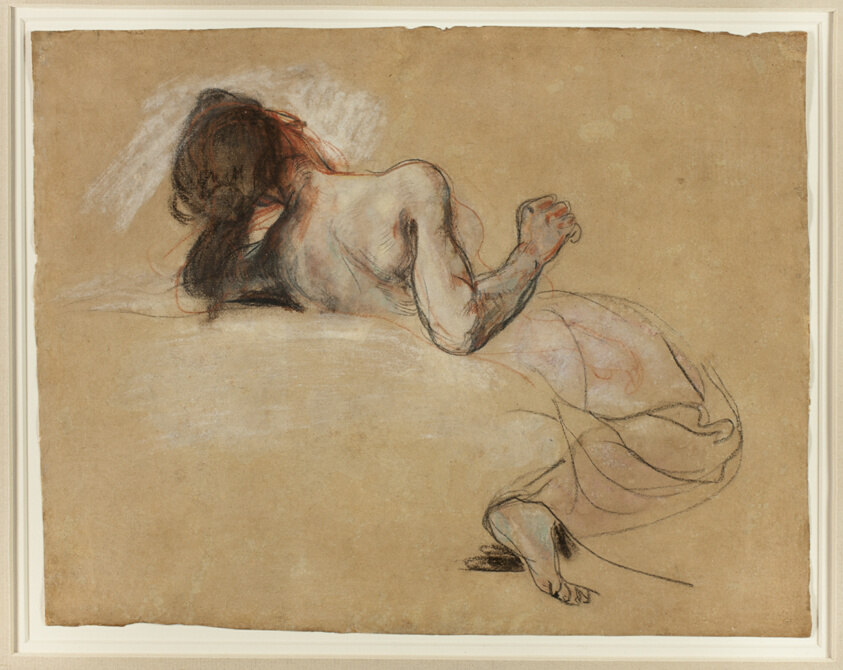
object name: Drawing and Watercolor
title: Crouching Woman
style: romantic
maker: Eugène Delacroix (French, 1798-1863)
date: 1827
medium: Black and red chalk, with pastel, heightened with white chalk, over wash, on tan wove paper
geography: France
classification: pastel; drawings (visual works); prints and drawing; paper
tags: women, white (color), red (color), black (color), brown (color)